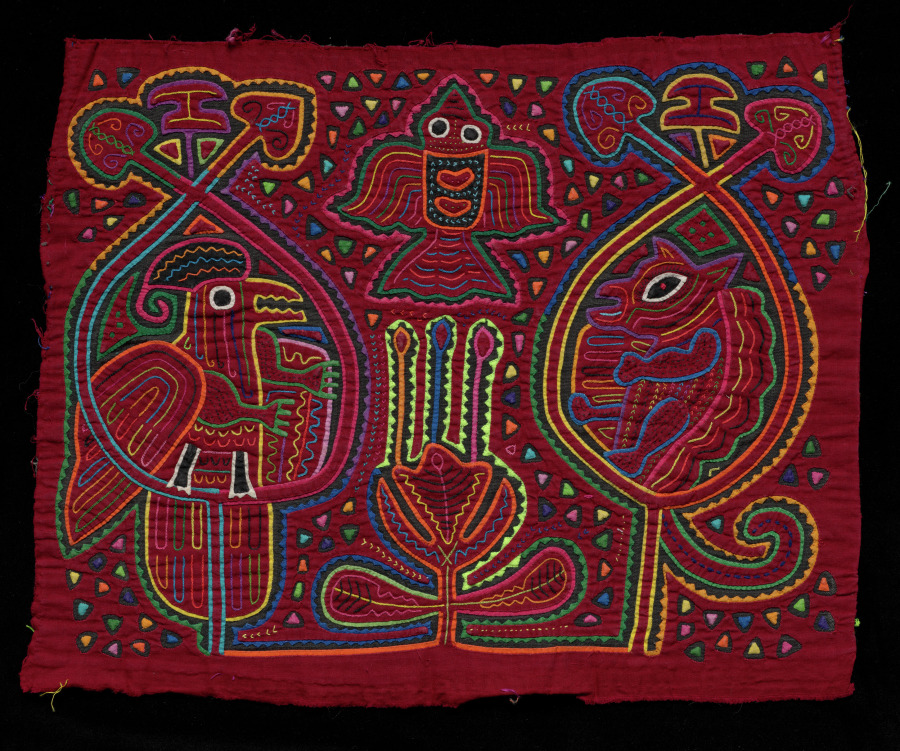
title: Flower, Birds, and Profile Animal Mola Panel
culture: Republic of Panamá, Gunayala Comarca, Guna people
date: 1900s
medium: Cotton; reverse appliqué, appliqué, embroidery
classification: Garment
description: This whimsical, well-made panel was created by a female artist of the Guna, an Indigenous people of the Republic of Panamá. It was one of two identical or similar panels that were stitched into the front or back of a blouse (mola). Such blouses are so distinctive to the Guna that they are the single most recognizable element of Guna cultural identity.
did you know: Such panels originally were sewn into blouses known as molas.